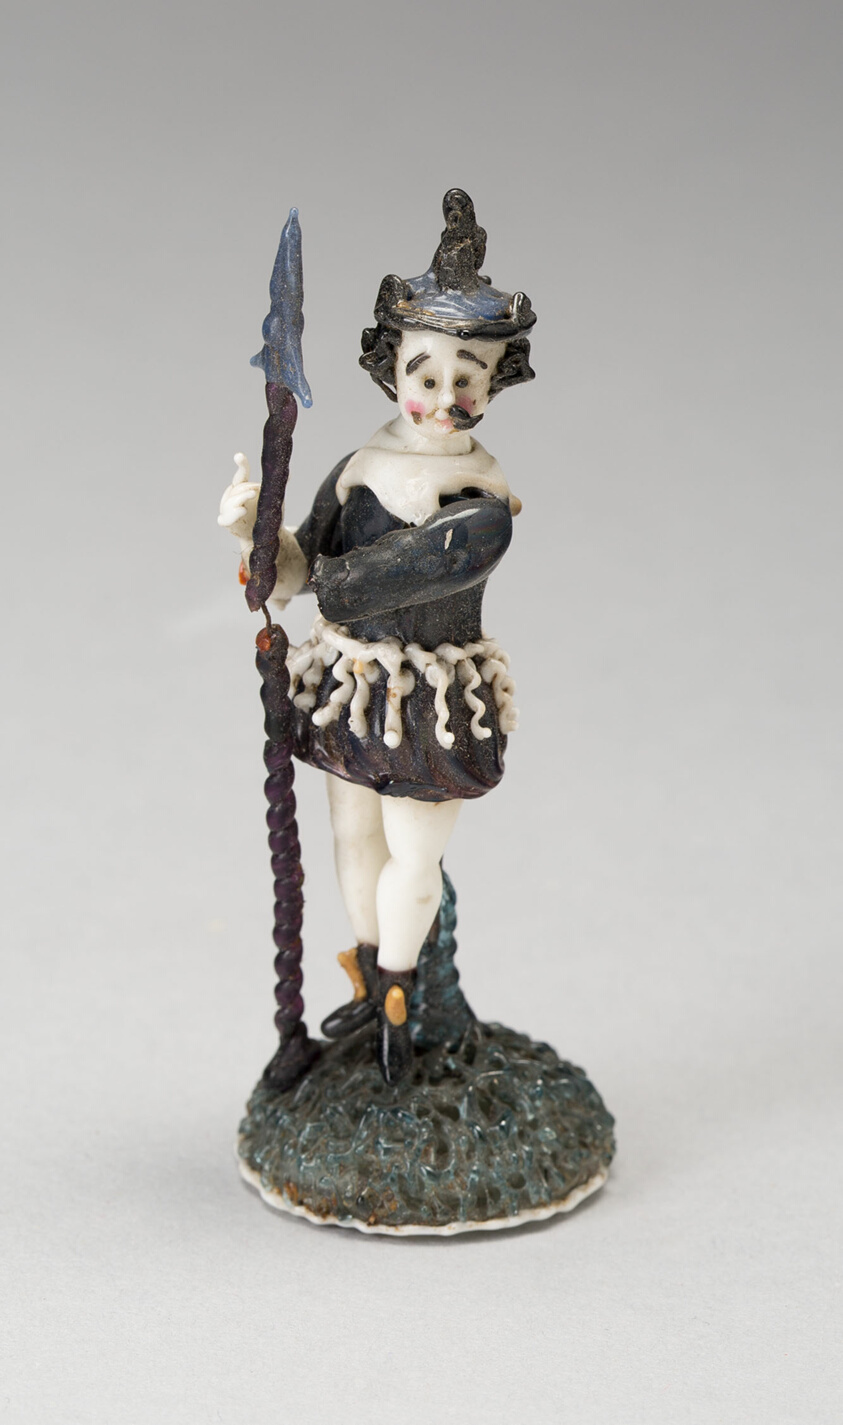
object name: Glass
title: Soldier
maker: Nevers, France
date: 1700/50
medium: Glass; lampwork (verre de Nevers), metal armature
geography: France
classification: glass; miniature; decorative object/ornament; european decorative arts